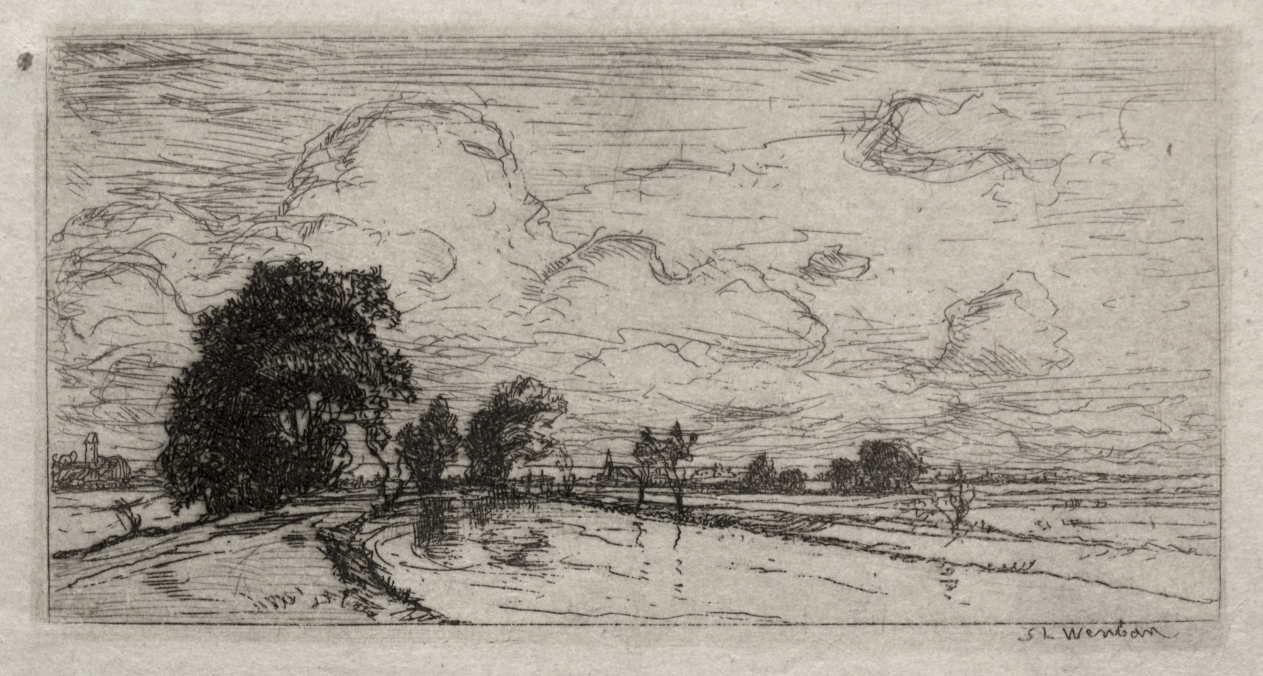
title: Flooded Landscape with Trees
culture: America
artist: Sion Longley Wenban (American, 1848–1897)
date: c. 1880s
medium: etching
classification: Print